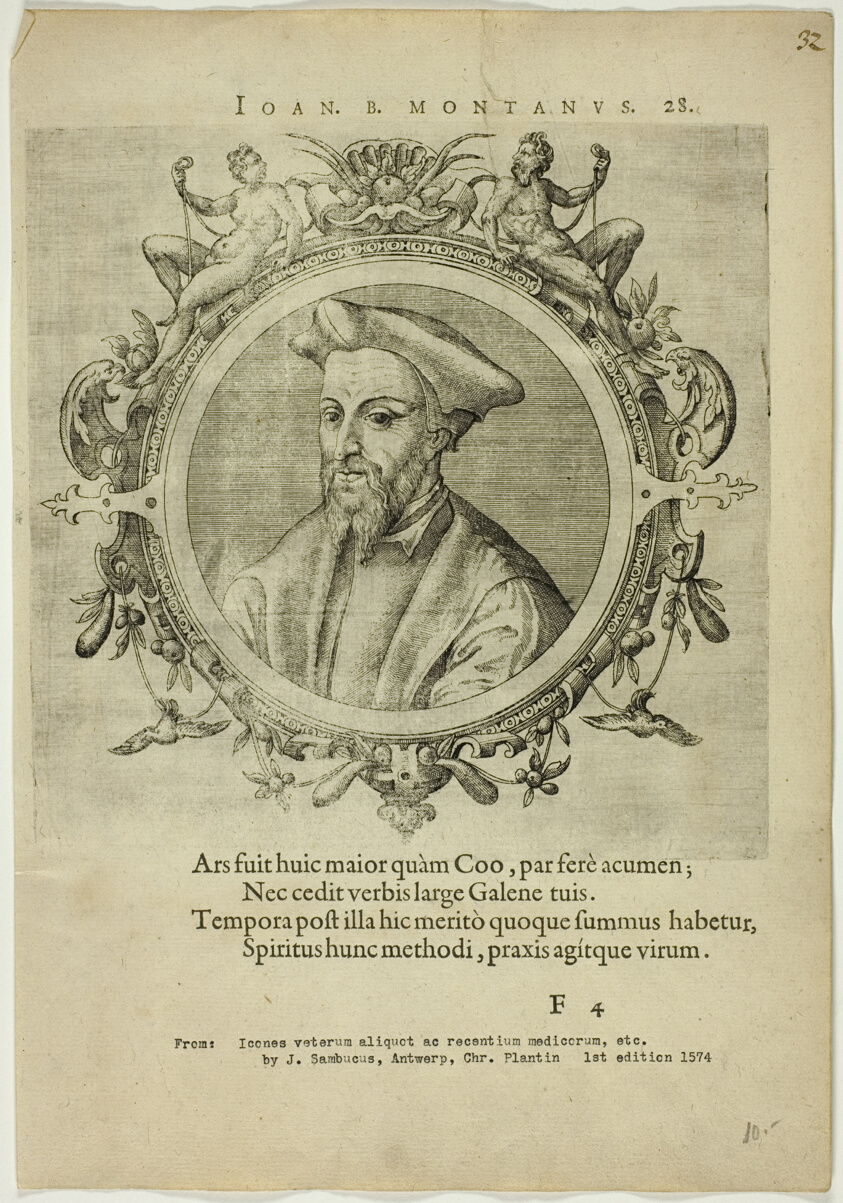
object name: Print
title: Portrait of Joan B. Montanus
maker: Unknown Artist (Flemish); written by Johannes Sambucus (Flemish, 1531-1584)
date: published 1574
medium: Etching, with engraving, on cream laid paper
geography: Flanders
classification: etching; print; prints and drawing